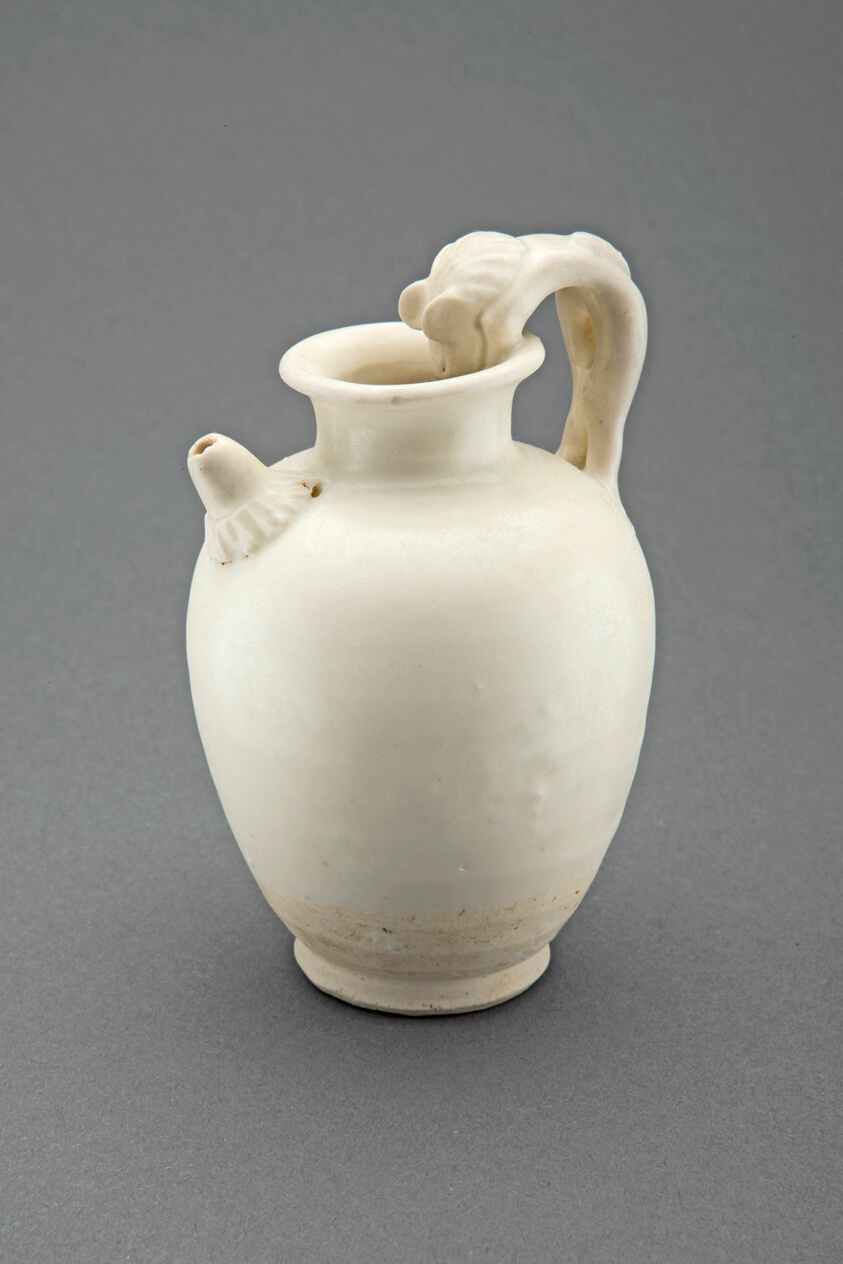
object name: Vessel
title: Ewer with Handle in the Form of an Arched Lion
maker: China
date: Tang dynasty (618–907), 7th/8th century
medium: Glazed stoneware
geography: China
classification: vessel